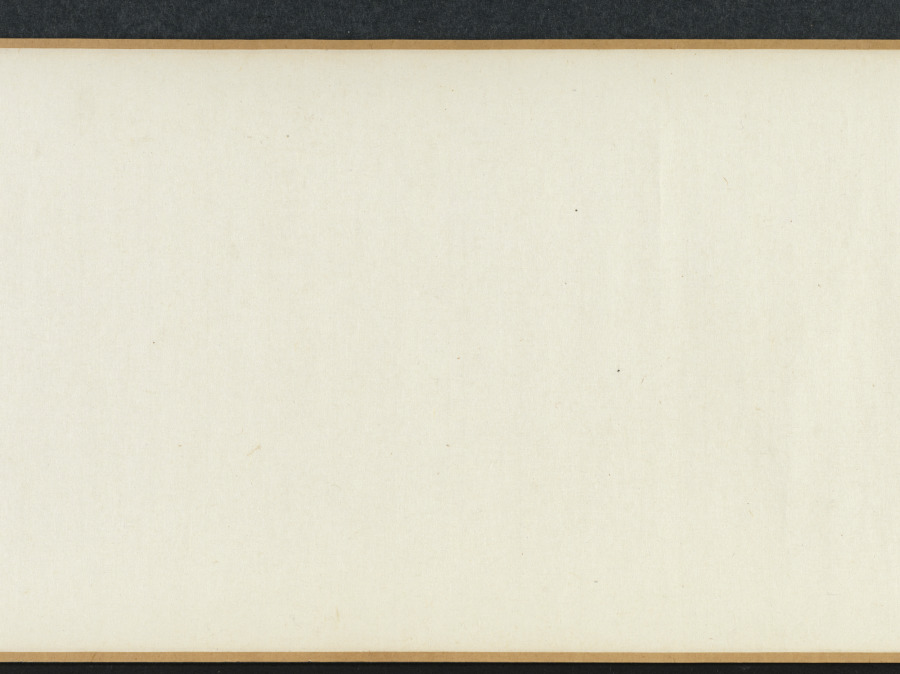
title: Zhao Mengfu Writing the Heart (Hridaya) Sutra in Exchange for Tea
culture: China, Ming dynasty (1368–1644)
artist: Qiu Ying (Chinese, 1494–1552)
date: 1542–43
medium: handscroll, ink and light color on paper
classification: Painting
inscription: Inscription accompanying text of "Heart" sutra, by Wen Zhengming 文徵明 (1470-1559): Zhengming 徵明, written in a boat at Kunshan 崑山, on the twenty-first day of the ninth month, in the renyin 壬寅 year, the twenty-first year of the Jiajing era [1542].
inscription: Colophon by Wang Shih-mou: Chou Yü-shün [Feng-lai] of K'un-shan was a scholarly, refined connoisseur of antiquities. He had acquired the poem written by Chao Ch'eng-chih [Chao Meng-fu] about the exchage of tea for Chao's calligraphy of the Prajna sutra. But the sutra itself, also written by Chao Meng-fu, is lost. He therefore asked Ch'iu Shih-fu [Ch'iu Ying] to do a painting and had Wen Cheng-ming, the artist-in-attendance, write the Hridaya Sutra in the "small, regular" style for replacement. Both works are so excellent that even Chao Meng-fu himself would certainly applaud if he should be reborn to see them. I, Shih-mou, had gotten possession of this scroll from the family of Chou Yü-shün, and since it was so wonderfully matched with one of the treasures in my collection. the Hridaya Sutra written by Chao Meng-fu for Priest Li in "running script," like the reuniting of two halves of a jade pi, I completed the scroll with the several colophons written for the "tea-exchange" poem. I did this because the painting of Ch'iu Ying and the calligraphy of Wen Cheng-ming are definitely masterpieces by themselves with absolutely no need to depend on any of the colophons written for the Chao Meng-fu poem. Furthermore, the two sons of Wen Cheng-ming, Shou-ch'eng [Wen P'eng] and Hsiu-ch'eng [Wen Chia]. have each written a colophon explaining the reason for replacing the calligraphy. As their writings are both acceptable for high standard, I didn't want to throw them away. [So by separating these into two scrolls] I was able to get two complete works of art in one clever stroke. I was quite pleased with myself, and hope that those who see this scroll shall not get suspicious because of the missing colophons. Wang Shih-mou wrote in his Jih-sun-chai study, on the first day of the tenth month, in the chia-shen year of the Wan-li era [1584].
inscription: Colophon by Wen P'eng: I-shao [Wang Hsi-chi] wrote in exchange for a flock of geese. Su Tung-po wrote in exchange for meat. Both episodes have become legends of a thousand years. Sung-hsüeh [Chao Meng-fu] "teased" Priest Kung for tea, and the story was immediately immortalized in the poems by all the famous scholars of the times. Indeed, how could one say his humor and elegance are not equal to the ancient worthies? Unfortunately, the poetry has survived but the writing of the sutra is lost. Yü-shün [Chou Feng-lai] therefore asked my father to make up the writing and so here is the complete work of art. Respectfully inscribed by Wen P'eng in the mid-summer of 1543.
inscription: Colophon by Wen Chia: Sung-hsüeh [Chao Meng-fu], in exchanging tea leaves for his writing of the Prajna, had put himself in the company of Yu-chün [Wang Hsi-chih] who exchanged geese for his writing of the Huang-t'ing sutra [the Yellow Chamber, or the Wai-ching ching, a Taoist text attributed to the Yellow Emperor]. However, was this romantic and cultivated gesture really intended for such small things? Actually, he was only proud that the excellence of his calligraphy had made him worthy to be the successor of the Ch'in Dynasty master. Since, very unfortunately, Chao Meng-fu's writing [of the Prajna] was already lost, my father therefore agreed to replace it, and did the calligraphy in the style of the Yellow Chamber. In addition, Yu-shün [Chou Feng-lai] had asked Mr. Ch'iu Shih-fu [Ch'iu Ying] to do a painting of the sutra writing story in the style of Li Lung-mien at the head of the scroll. Now it would seem the entire episode should go down in history for immortality. Respectfully recorded by Wen Chia, on the eighth day of the eighth month, in the year of k'uei-mao [1543]. trans. WKH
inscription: 4 colophons and 23 seals: 1 colophon, dated 1543, and 2 seals of Wen Peng (1498-1573); 1 colophon, dated 1543, and 2 seals of Wen Chia (1501-1583); 1 colophon, dated 1584, and 3 seals of Wang Shih-mou (1536-1588); 2 seals of Chou Feng-lai (16th c.); 3 seals of Sung Lo (1634-1713); 5 seals of the Ch'ien-lung emperor (r. 1736-95); 1 colophon, dated 1902, and 1 seal of Fei Nien-tz'u (1885-1905); 4 seals of Wan-go H. C. Weng (b. 1918); 1 seal unidentified.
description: The Yuan dynasty calligrapher Zhao Mengfu (1254–1322) is said to have transcribed the Heart Sutra for a certain priest named Li in exchange for tea. Later, during the Ming dynasty, the professional painter Qiu Ying from Suzhou painted this scene for his patron. Here, Zhao Mengfu holds a brush and has a piece of paper laid out before him. On the table is an ink stone, an ink stick, and a small water dropper. Drops of water would dissolve the ink stick into liquid ink when it was ground on the flat square stone.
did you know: Qiu Ying was born to a peasant family, but his natural talent led him to a successful career as a professional painter with wealthy patrons.